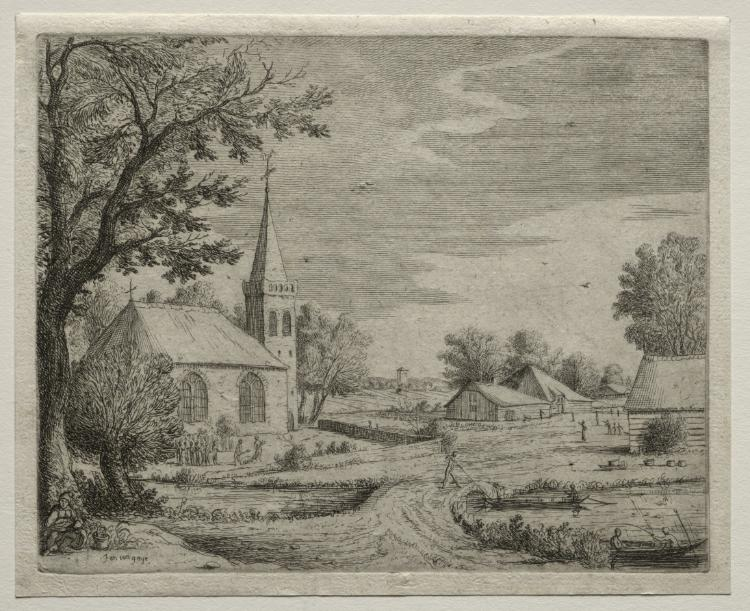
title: Village Church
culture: Netherlands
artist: Jan van Goyen (Dutch, 1596–1656)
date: c. 1650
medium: etching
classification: Print